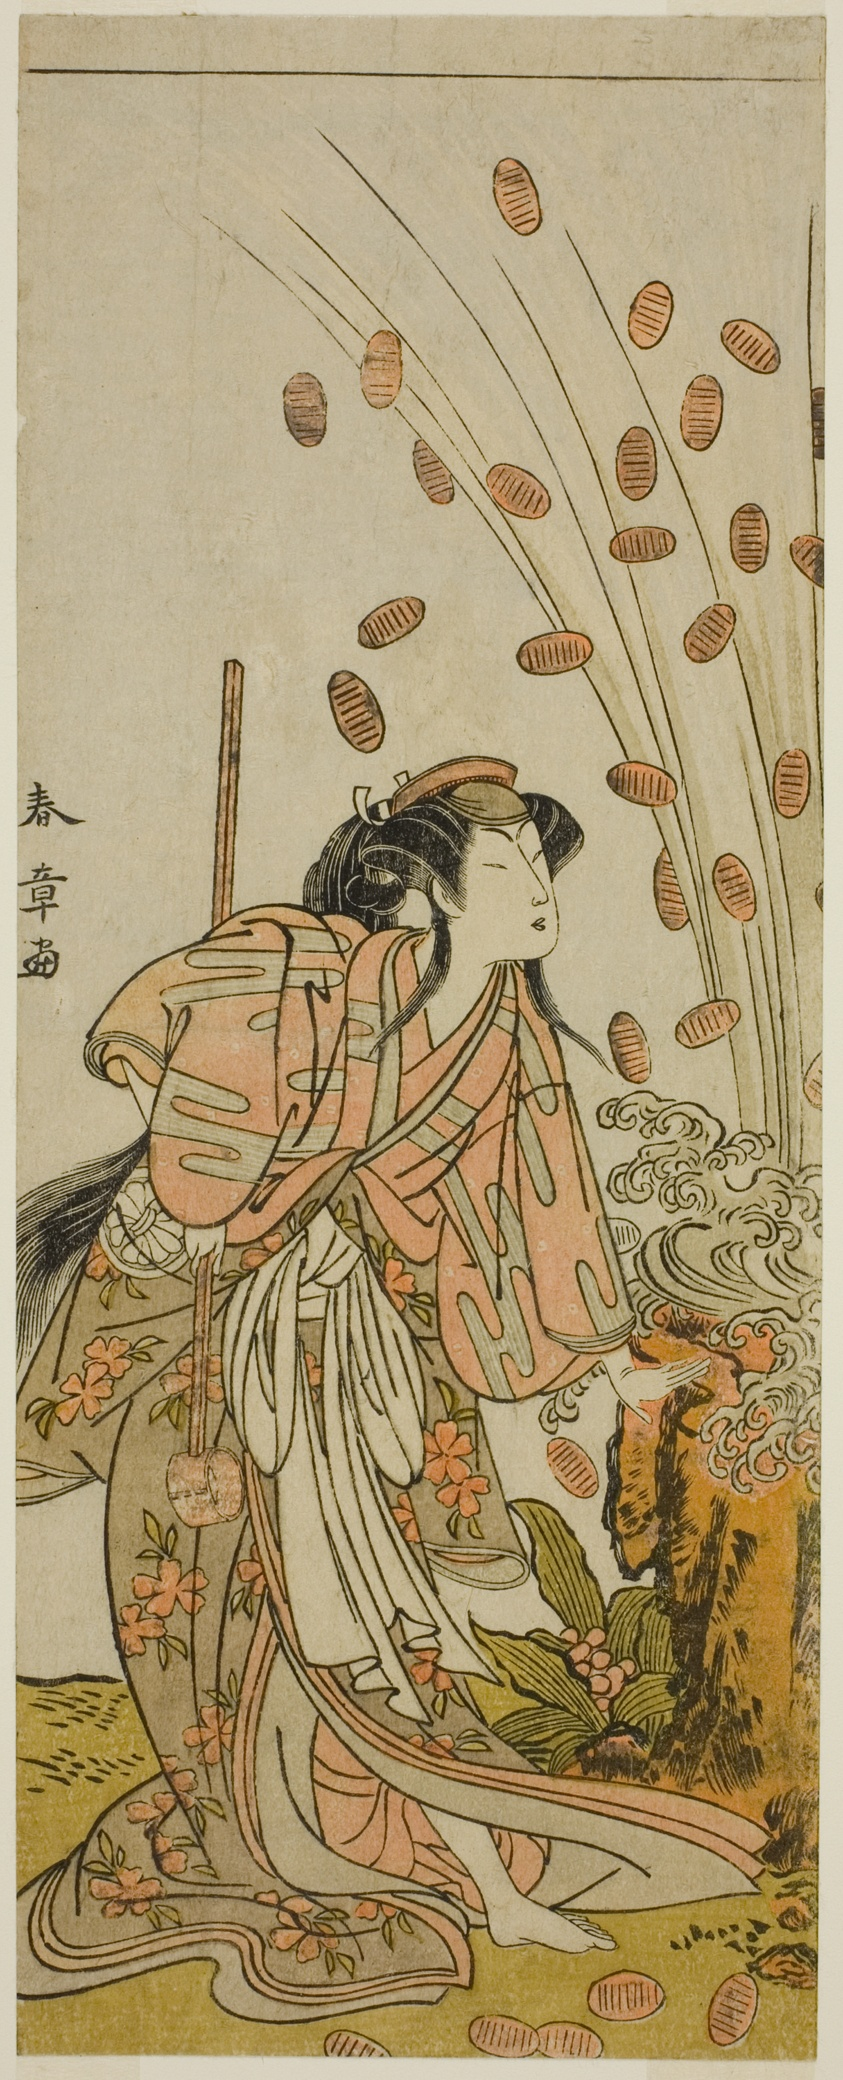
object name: Print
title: The Actor Segawa Kikunojo III as Hito-maru Disguised as the Courtesan Chiyozaki, in the Play Kuruwa no Hana Katsuragi no Kane, Performed at the Ichimura Theater in the third Month, 1775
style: Japanese (culture or style)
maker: Katsukawa Shunsho 勝川 春章; Japanese, 1726-1792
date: c. 1775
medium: Color woodblock print; hosoban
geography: Japan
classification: woodblock print; print; asian art